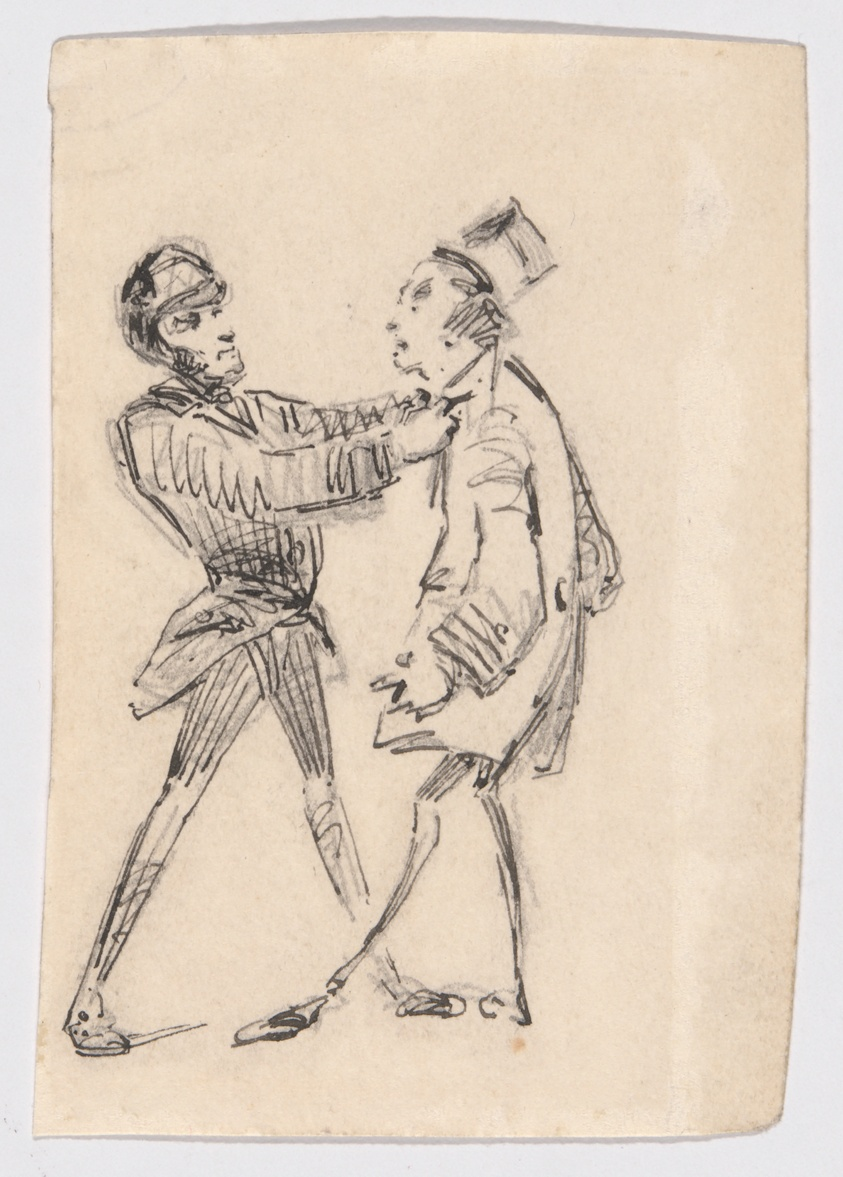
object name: Drawing and Watercolor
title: Policeman and Citizen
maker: James McNeill Whistler (American, 1834-1903)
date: 1854/55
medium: Pen and black ink over graphite on cream wove paper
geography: United States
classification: pen and ink drawings; drawings (visual works); prints and drawing; paper